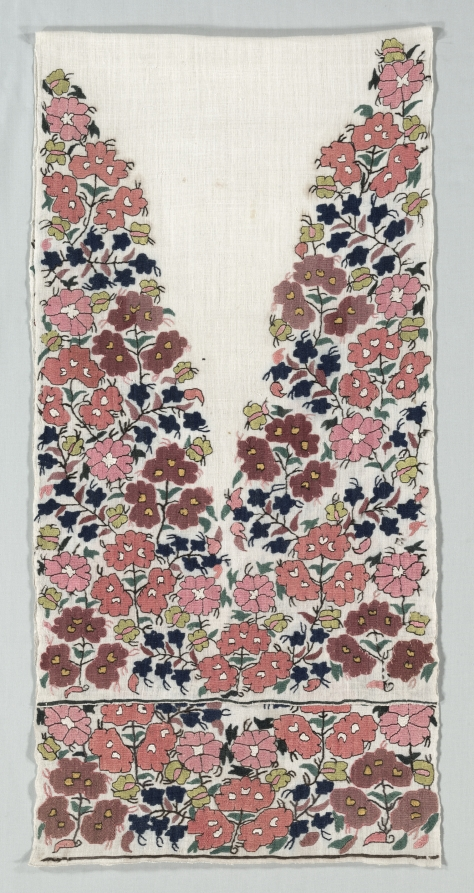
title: Scarf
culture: Africa, North Africa, Algeria, Algerian embroiderer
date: 1800s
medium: Linen, silk, dye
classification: Embroidery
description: This woven linen textile is embroidered with a cascading pattern of dusty pink, mauve, and navy blue flowers. The embroiderer created this design with dyed silk thread, outlining the shapes in black and then filling in the designs with dense stitches. Textiles with this composition were made across the Mediterranean Sea in the 1800s, and were used as scarves or towels.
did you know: This example was displayed in one of the CMA’s earliest exhibitions, 1923’s Eighteenth and Nineteenth Century Oriental Embroideries in 1923.